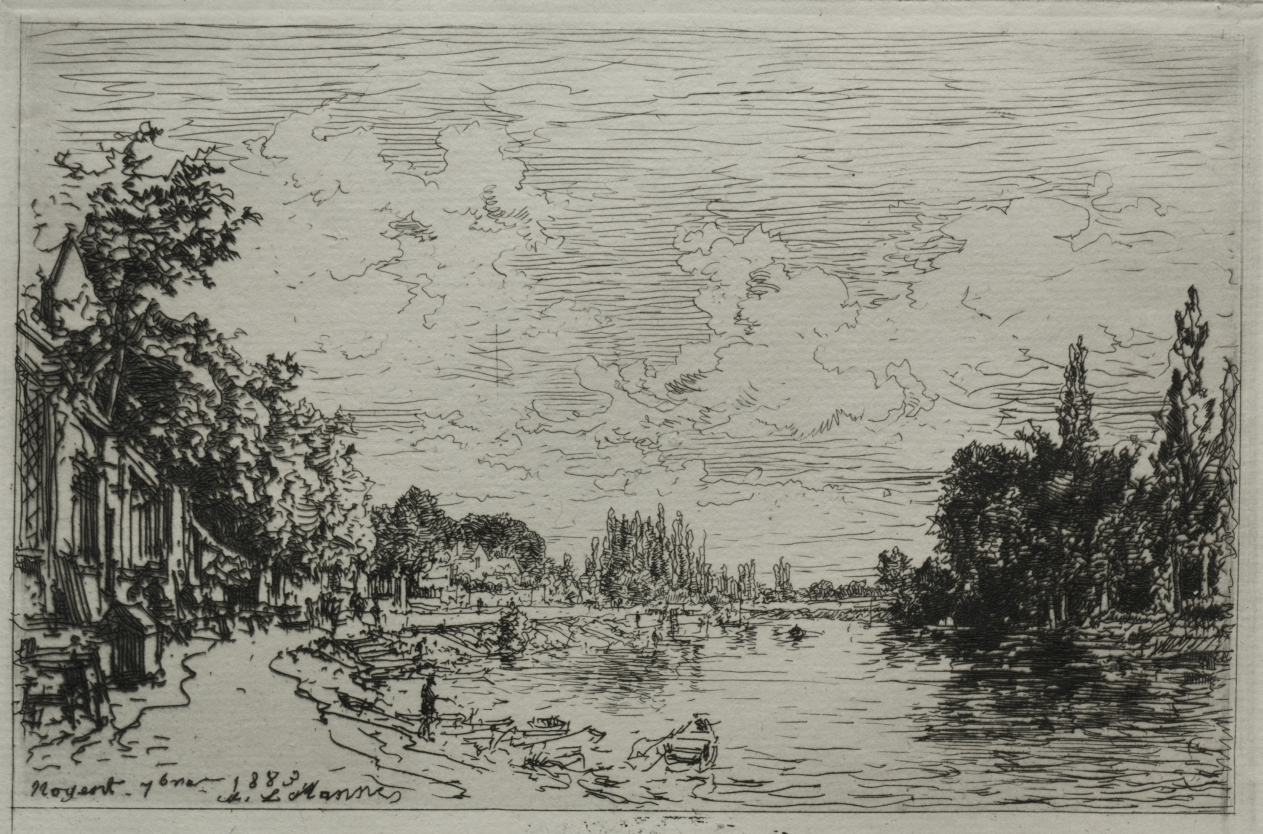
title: Noyant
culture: France, 19th century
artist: Maxime Lalanne (French, 1827–1886)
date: 1883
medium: etching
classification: Print